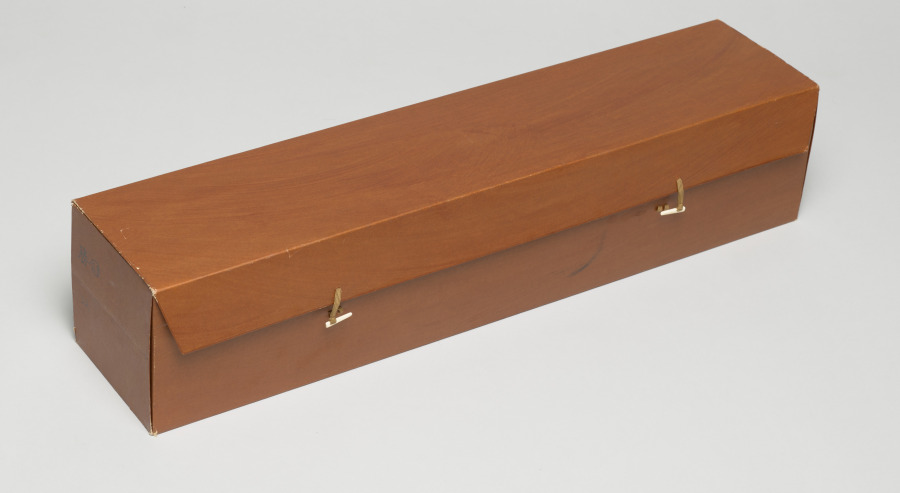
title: Coastal Landscape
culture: Japan, Momoyama period (1573–1615)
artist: Iwasa Matabei (Japanese, 1578–1650)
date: 1573–1615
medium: hanging scroll; ink on paper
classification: Painting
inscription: signed: signature unread